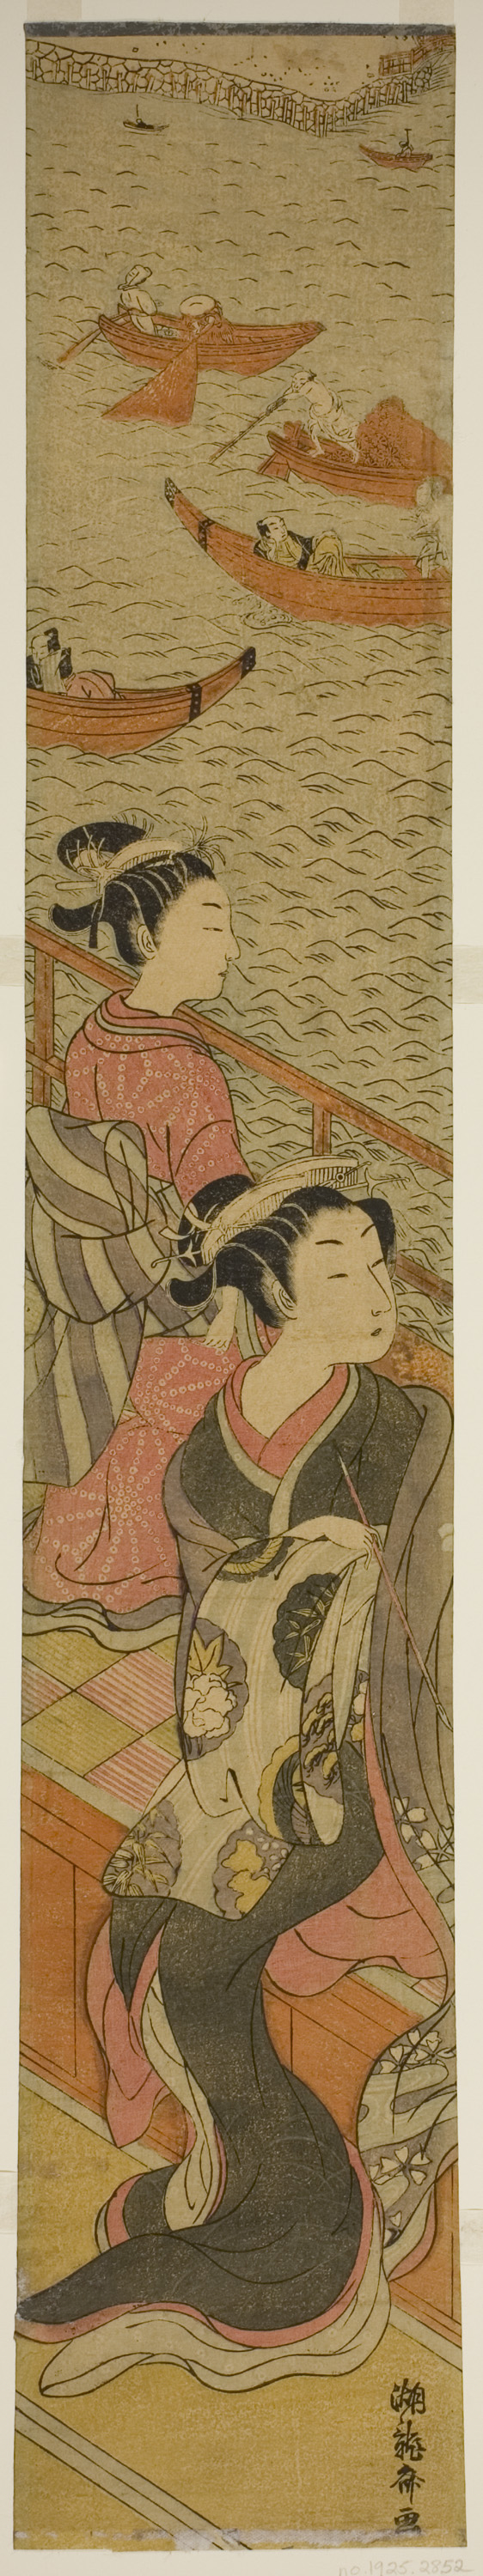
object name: Print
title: Courtesan and Her Attendant on a Balcony Overlooking River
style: Japanese (culture or style)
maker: Isoda Koryusai (Japanese, 1735-1790)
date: c. 1771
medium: Color woodblock print; hashira-e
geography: Japan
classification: woodblock print; print; asian art